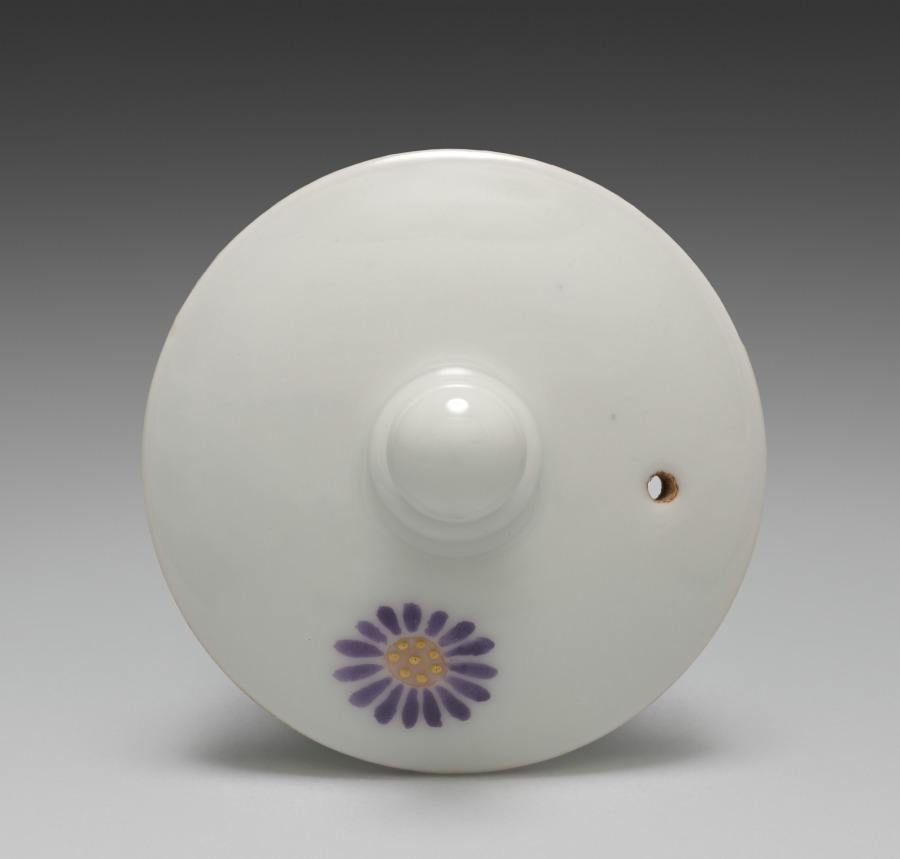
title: Lid for a Teapot with Chrysanthemum Motifs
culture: Japan, Meiji period (1868–1912)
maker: Seifū Yohei III (Japanese, 1851–1914)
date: 1912–14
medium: Porcelain with overglaze color enamel and gold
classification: Ceramic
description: This side-handled sencha teapot has the lid flush against the body, forming an oblong orb. It is decorated with a sprinkling of similar chrysanthemum motifs in red, green, and purple overglaze color enamels with centers of pale red dotted with gold.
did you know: This teapot with chrysanthemum motifs shows off Seifū Yohei III’s technique of enamels painted over the glaze.